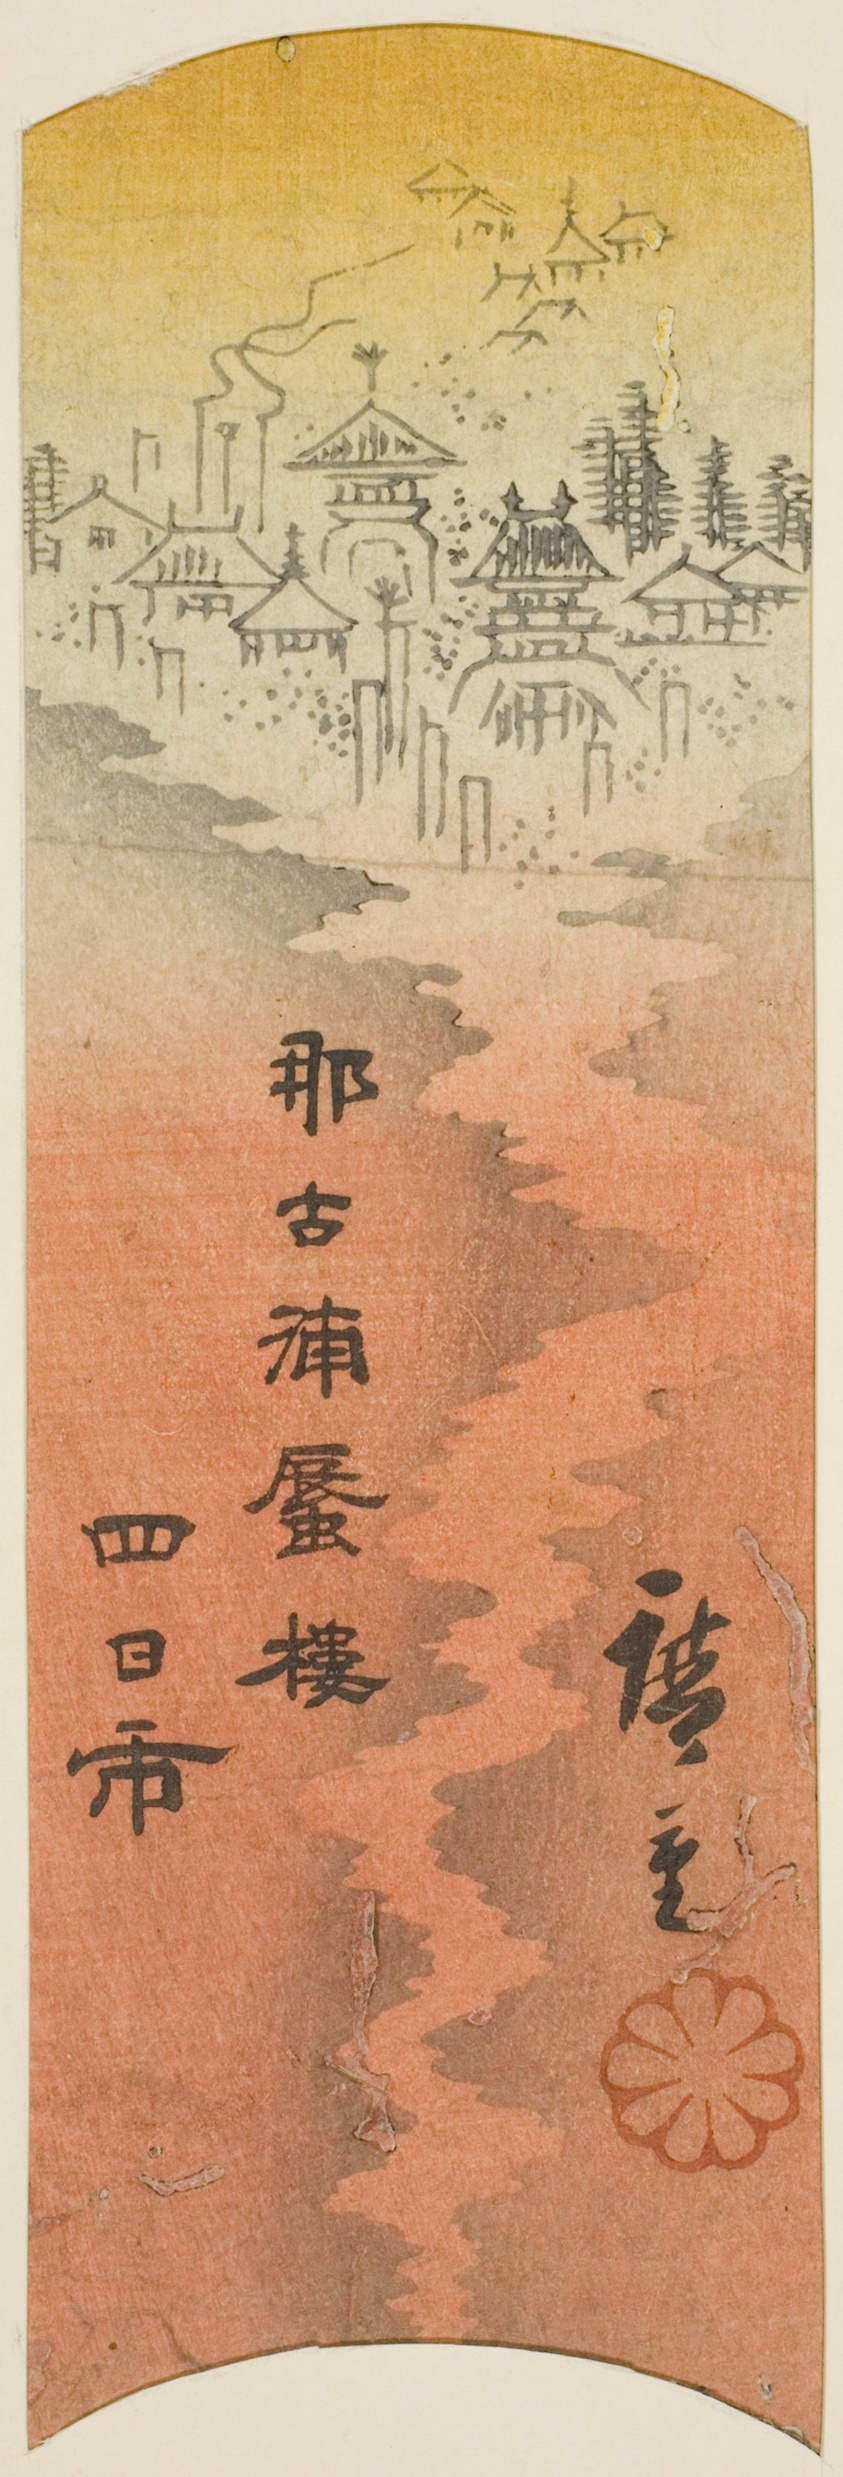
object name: Print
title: Yokkaichi, section of sheet no. 10 from the series "Cutout Pictures of the Tokaido (Tokaido harimaze zue)"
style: Japanese (culture or style)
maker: Utagawa Hiroshige 歌川 広重; Japanese, 1797-1858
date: c. 1848/52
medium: Color woodblock print; section of harimaze sheet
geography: Japan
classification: woodblock print; print; asian art